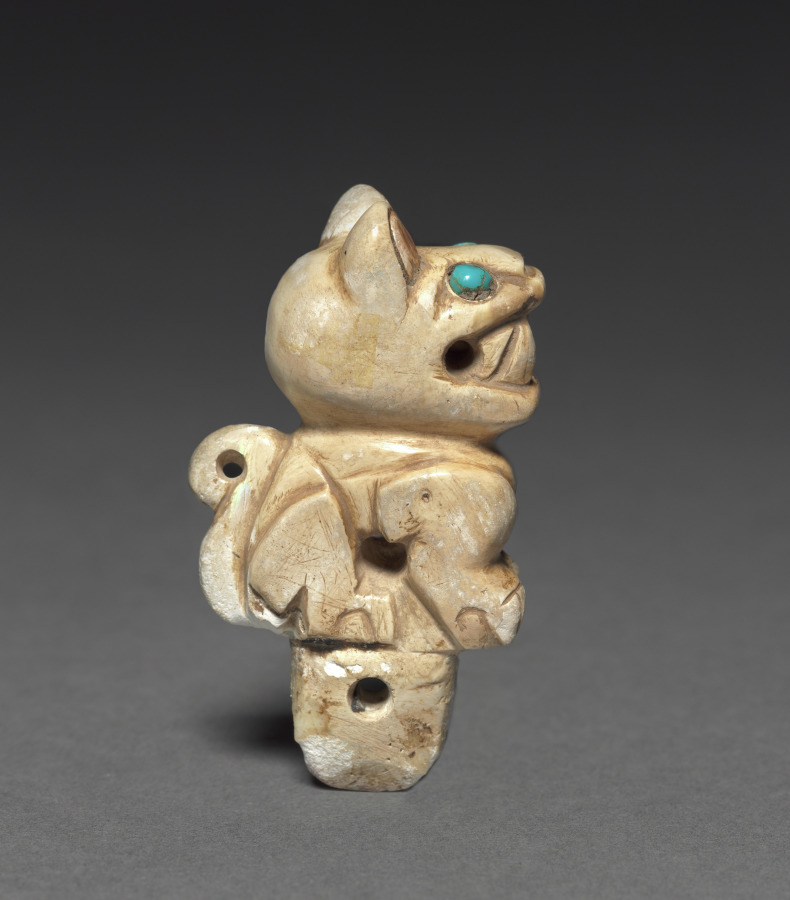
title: Crouching Feline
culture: Peru, Wari (?), 6th-10th Century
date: c. 500–900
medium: stone, turquoise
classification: Jewelry